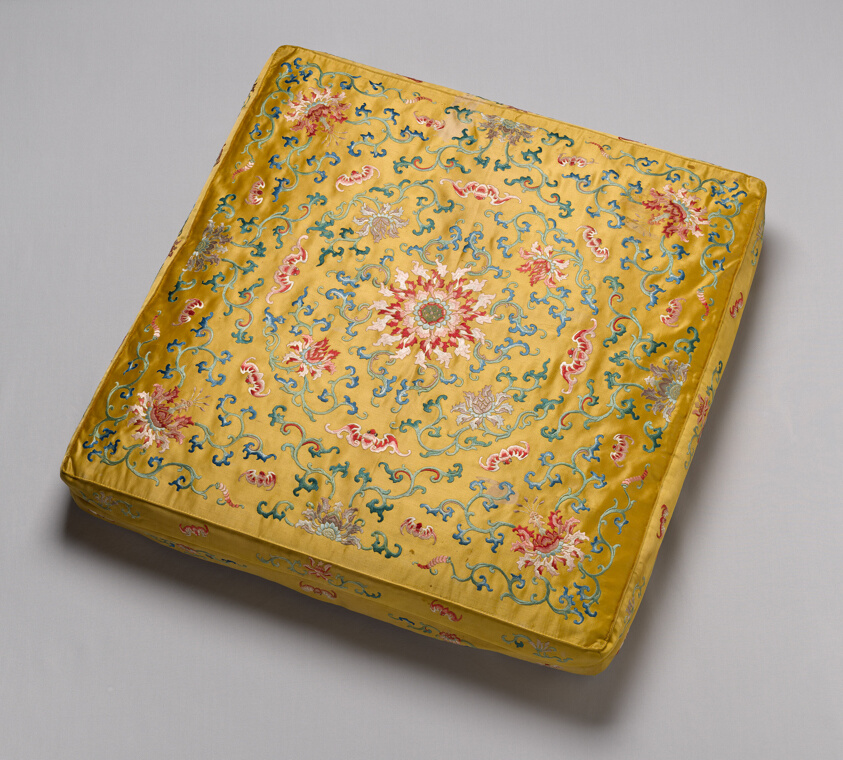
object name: Textile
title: Cushion Cover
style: qing, Chinese (culture or style), East Asian, asian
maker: Manchu (China)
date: Qing dynasty (1644–1911), 1750/1800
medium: Silk, warp-float faced 7:1 satin weave; embroidered in knot, satin, and stem stitches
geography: China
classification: textile; needlework (visual works); weaving